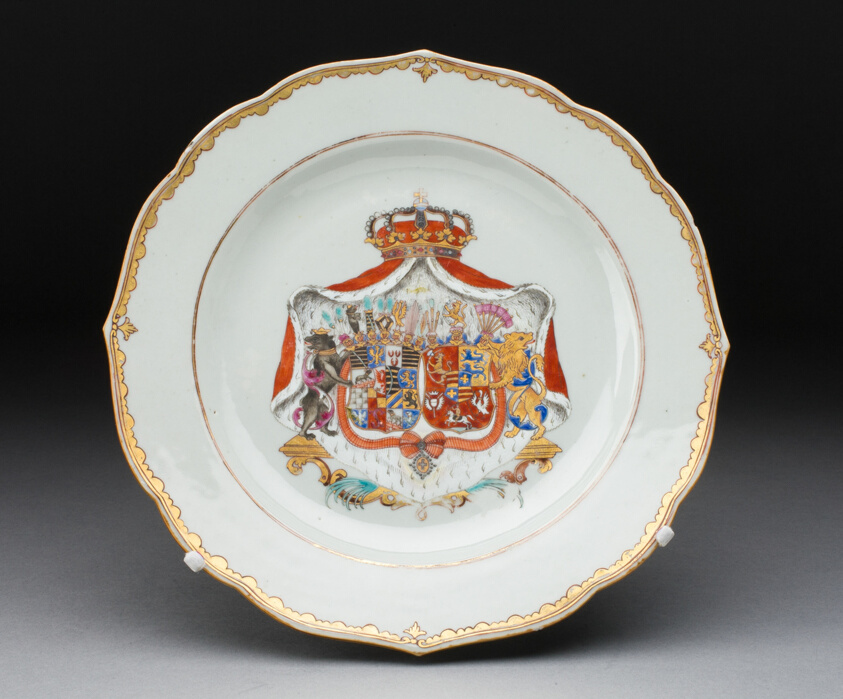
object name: Ceramics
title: Plate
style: chinese export, Chinese (culture or style), East Asian, asian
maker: China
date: c. 1750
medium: Hard-paste porcelain with polychrome enamels and gilding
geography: Jingdezhen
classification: plate (general, dish); dish (vessel); chinese export porcelain; porcelain; european decorative arts; ceramics